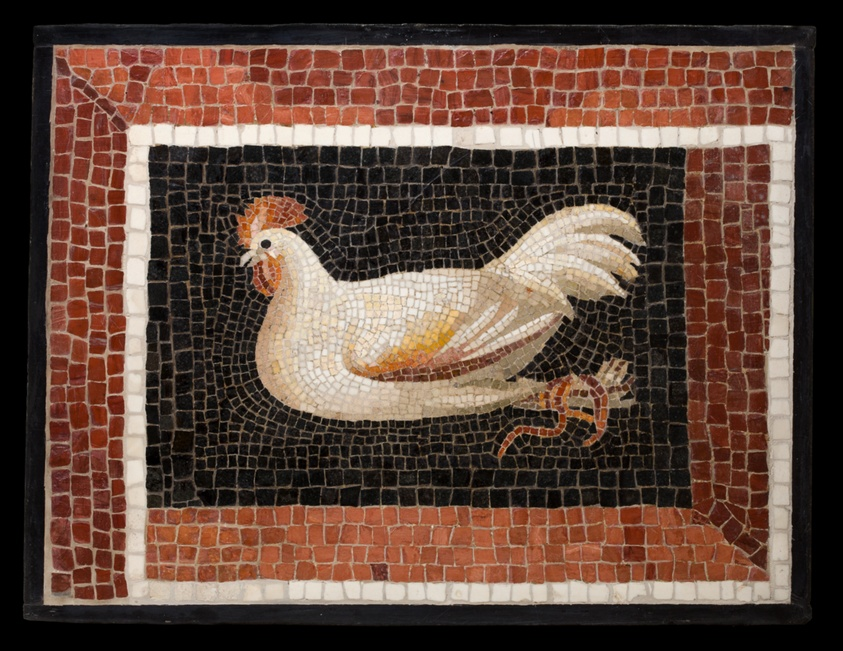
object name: Architectural fragment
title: Mosaic Floor Panel Depicting a Bound Rooster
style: roman (ancient, style or period), ancient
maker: Roman; Rome, Italy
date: 2nd century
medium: Stone, mortar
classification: architectural fragment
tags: animals